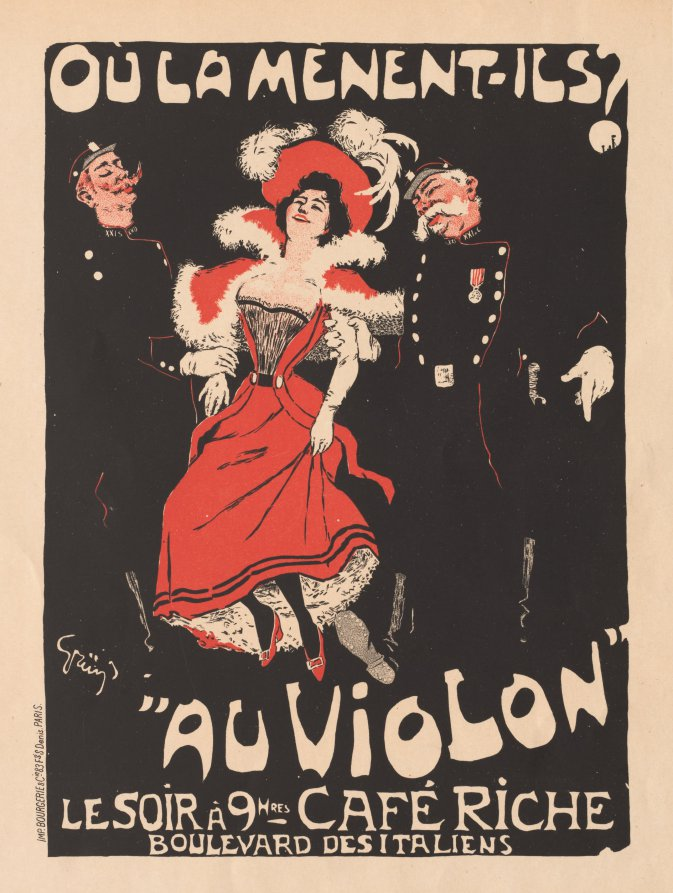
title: Les Maitres de L'Affiche: Pl. 103 Café Reche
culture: France, 19th century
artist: Jules-Alexandre Grün (French, 1868–1934)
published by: Bourgerie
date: 1897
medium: color lithograph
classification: Print